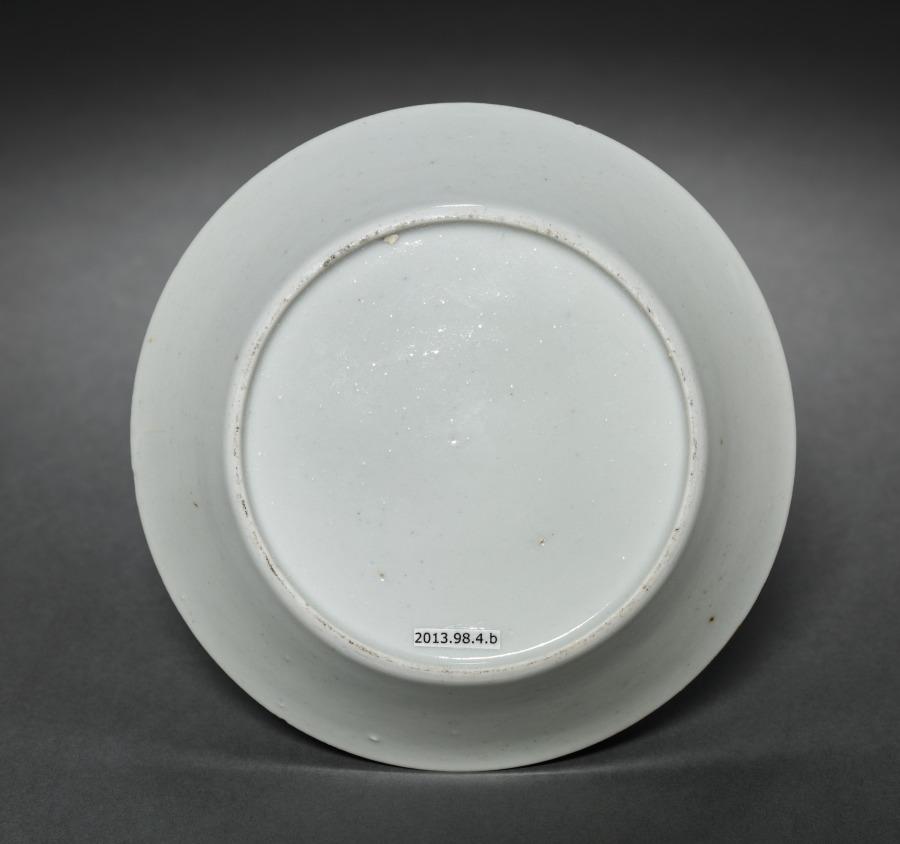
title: Saucer from Oliver Wolcott, Jr. Tea Service (4 of 6)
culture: Chinese Export porcelain, late 18th-early 19th century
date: 1785–1805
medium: porcelain, sepia enamel, gold leaf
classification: Ceramic